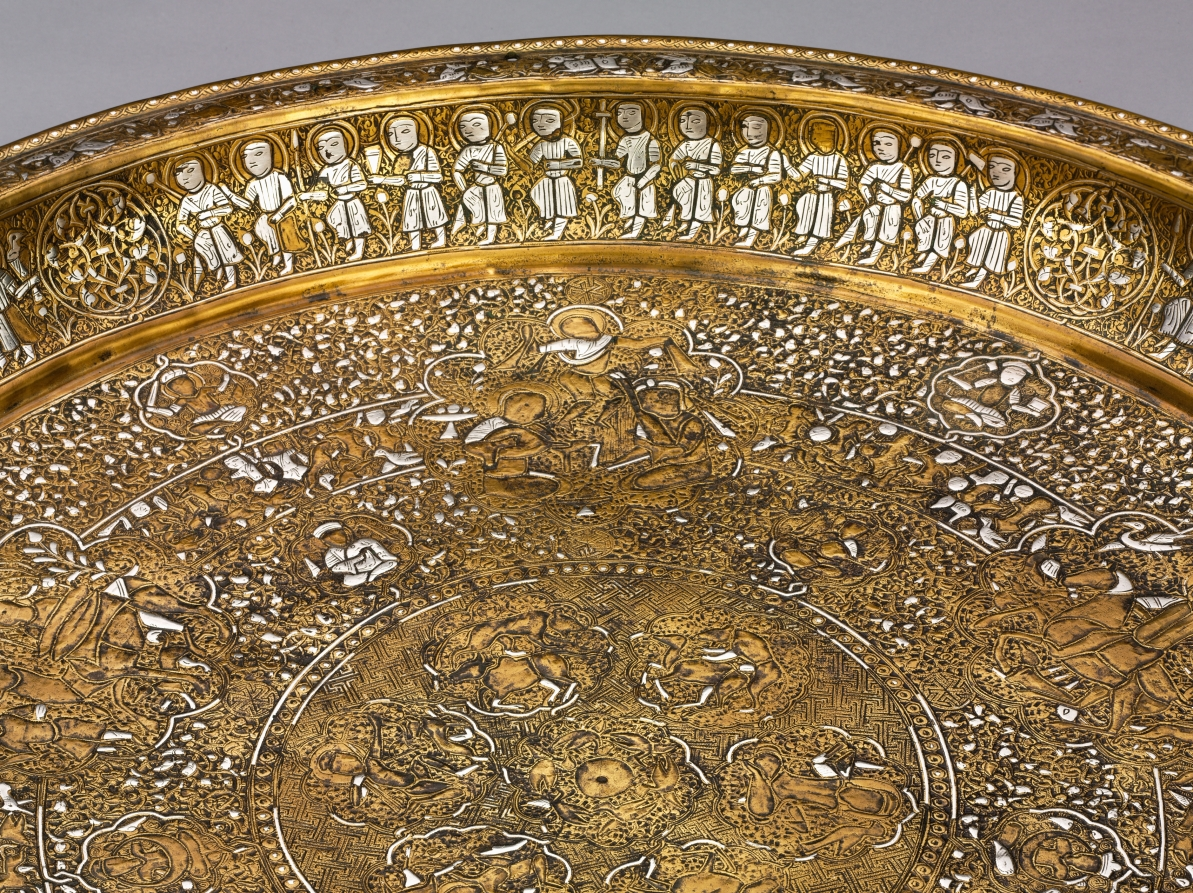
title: Tray Portraying Courtly Pleasures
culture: Syria, Ayyubid period (1171–1260)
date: 1240s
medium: sheet brass inlaid with silver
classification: Metalwork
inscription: The presence of ligatures in the narrow circular bands with interconnected human and animal figures suggests this may be a degenerate form of animated script. It is indecipherable.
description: This tray features images of courtly life interspersed with astronomical symbols. The scenes contained within large multilobed medallions display an enthroned prince with lions at his feet, a banquet, a hunt, dancers, and musicians. Contained within the concentric circles there are also references to solar and lunar motifs, including figures holding sunbursts and lunar crescents. This tray is made of a single sheet of brass and the silver inlay, which is best preserved on the tray’s inner curve, suggests its original brilliance.